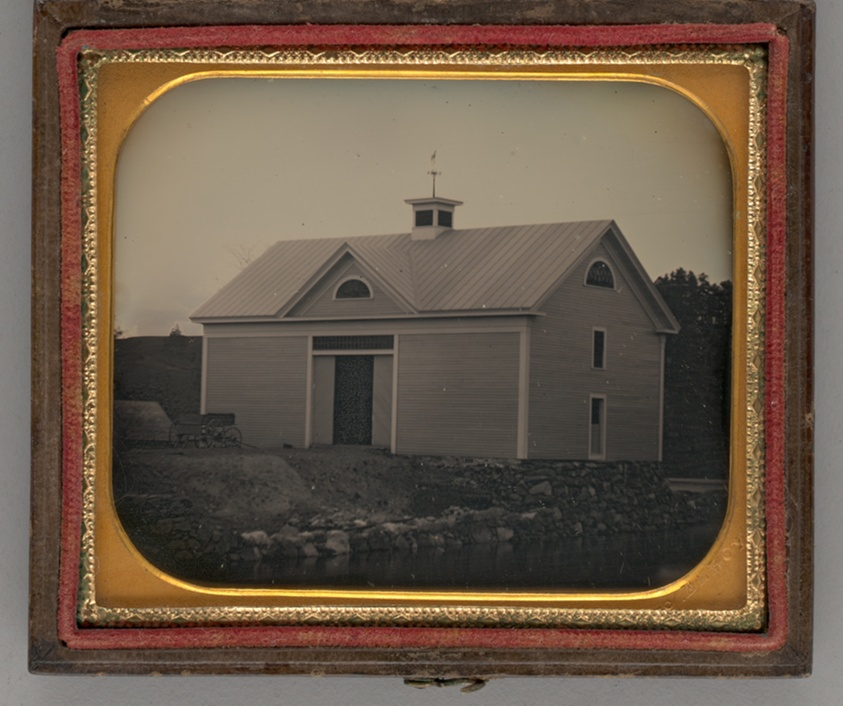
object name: Photograph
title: Untitled (Barn)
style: 19th century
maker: John McElroy; American, 19th century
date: 1851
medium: Daguerreotype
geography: United States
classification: photography; photographic process; photograph; daguerreotype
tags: lundberg collection, rural life, houses, buildings